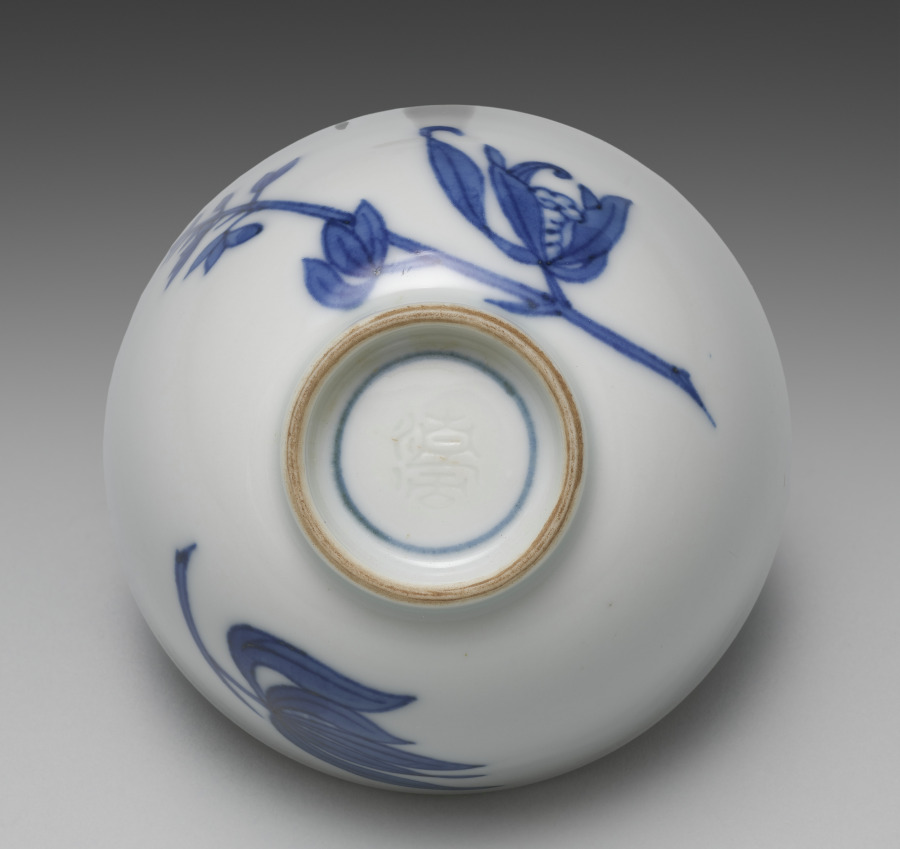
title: Teacup from Tea Set with Orchids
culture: Japan, Meiji period (1868–1912)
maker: Seifū Yohei III (Japanese, 1851–1914)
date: c. 1893–1914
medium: Porcelain with underglaze blue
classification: Ceramic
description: Although the teapot here is stored in a separate box from the five cups, these six pieces may once have been part of a tea set that included other tools such as a water cooler. The teacups have orchid flowers on both sides in underglaze blue, as well as a blue band inside the footring. The teapot has the same design and a blue band painted around the bottom of the lid’s knob. The cups’ long wood storage box is stamped on the exterior, over the lid and base, with a small red seal reading “Satō.” The same seal appears on five small squares of yellow textile, one placed in the bottom of each compartment in the teacup storage box. These are additional to the customary yellow cloths stamped with a “Seifu” seal. Interestingly, four of the Seifū cloths are stamped with an ovoid seal, while the remaining cloth, which is a slightly lighter color, has an unusual seal that is not quite gourd-shaped and with the fū of Seifū in a stylized, unrecognizable form. The teapot has its own box with a Satō seal and is wrapped with an orange textile stamped with the same unusual Seifū seal. A set with a very similar surface design is in the Brooklyn Museum. The Brooklyn set has a water cooler and a small pitcher, in addition to the teapot and cups, and all are in a single storage box. This box records the tea tools as made with kanpakuji, or “bright-jewel white porcelain,” counted among Yohei III’s most important inventions, and carved images. In fact, both sets have a white surface much closer in coloration to the cool white of porcelain clay used in Kyoto at the time, and the designs are simply painted. The Brooklyn set was thus likely mismatched at some point with a box intended for another tea set. Nonetheless, the box may have helped prevent the set’s original components from being dispersed, and the set itself provides insight into how the other tools from the present set may have looked.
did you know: This tea set with orchids has a side-handled pot called a kyūsu, used for steeping, straining, and serving tea.